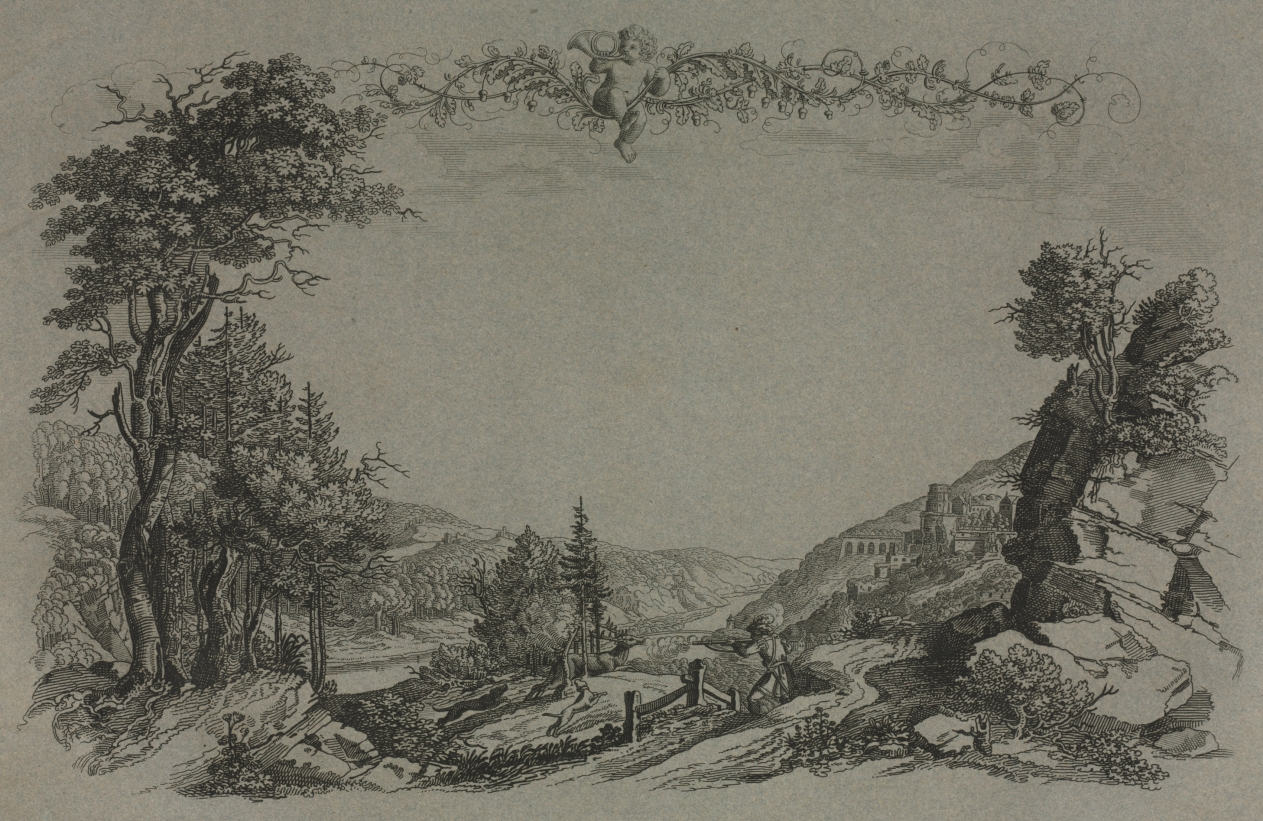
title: Six Views of Heidelberg Castle: Cover, Hunting Scene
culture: Germany, 19th century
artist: Ernst Fries (German, 1801–1833)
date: 1820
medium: etched and engraved grey-blue wove paper cover of bound group of 6 lithographs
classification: Print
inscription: In pencil: 3268. F.